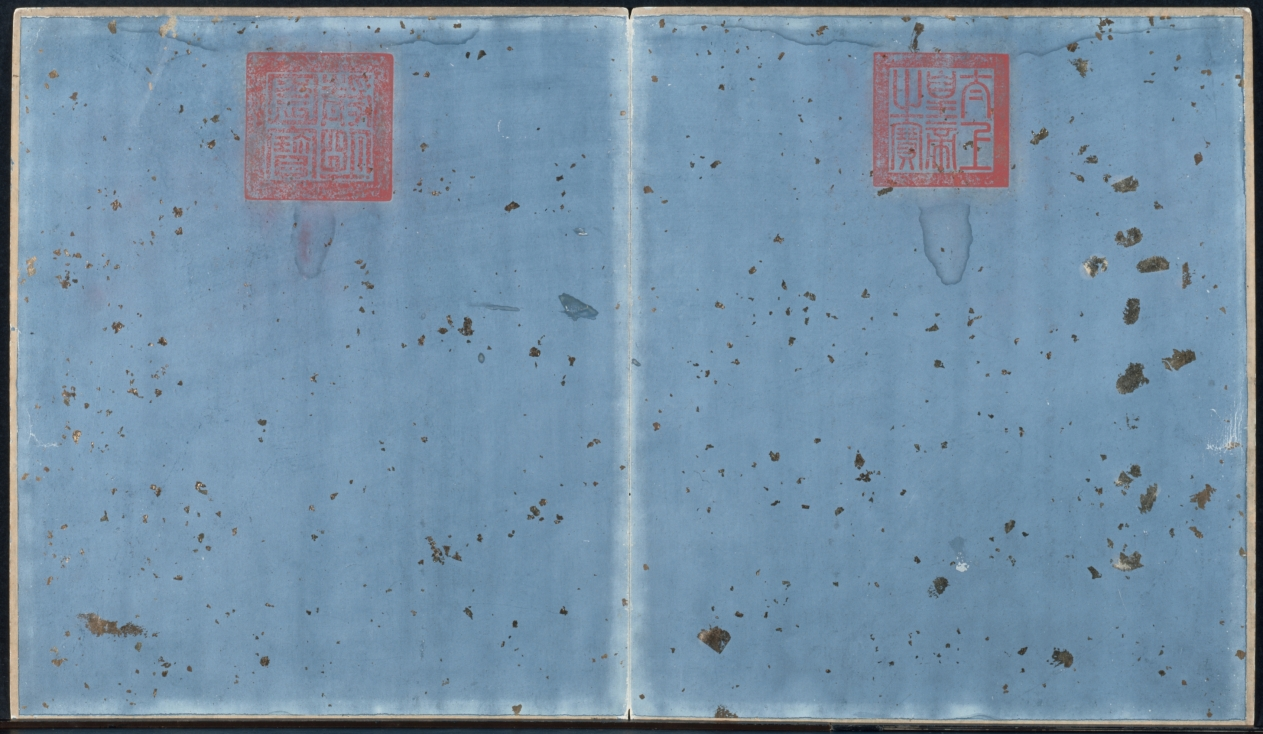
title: Battle Scenes of the Quelling of Rebellions in the Western Regions, with Imperial Poems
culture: China, Qing dynasty (1644–1911), Qianlong reign (1736–95)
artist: Giuseppe Castiglione (Italian, 1688–1766)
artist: Jean Damascene Sallusti (Italian, d. 1781)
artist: Jean Denis Attiret (French, 1702–1768)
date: c. 1765–74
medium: Etchings, mounted in album form, 16 leaves plus two additional leaves of inscriptions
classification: Print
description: This set of etchings was commissioned by Emperor Qianlong to record in pictorial terms the courage of his generals and soldiers in quelling the rebellions in the Western Regions. Qianlong added his own poem to each of the etchings, indicating his appreciation and pride in this demonstration of military might. "Western Regions" refers to the present-day Xingjiang province, often described in Western writing as "Central Asia."